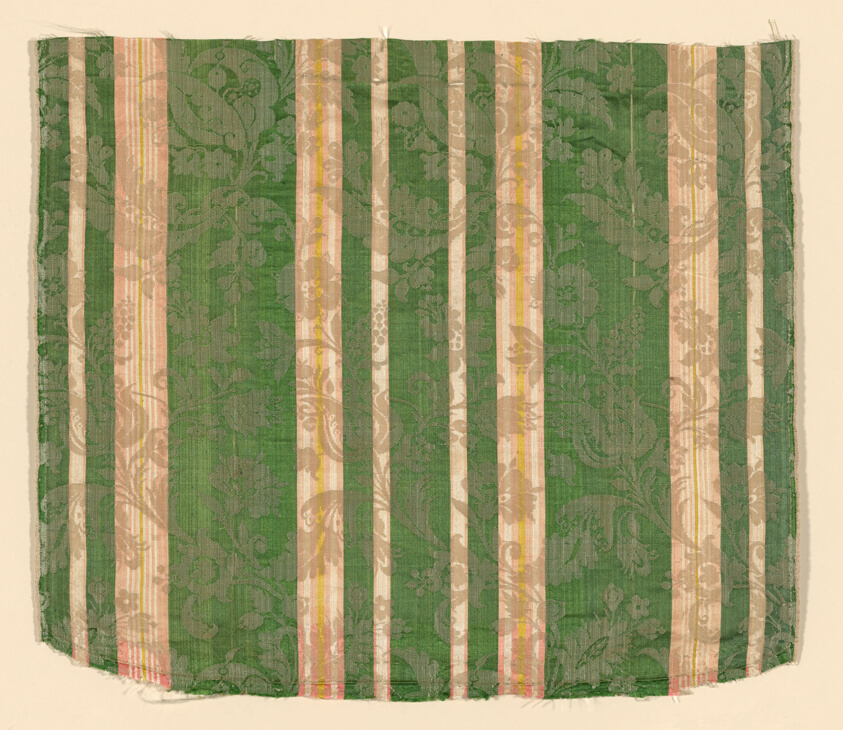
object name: Textile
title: Fragment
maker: France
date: 1645/75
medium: Silk, satin damask weave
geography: France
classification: textile; weaving